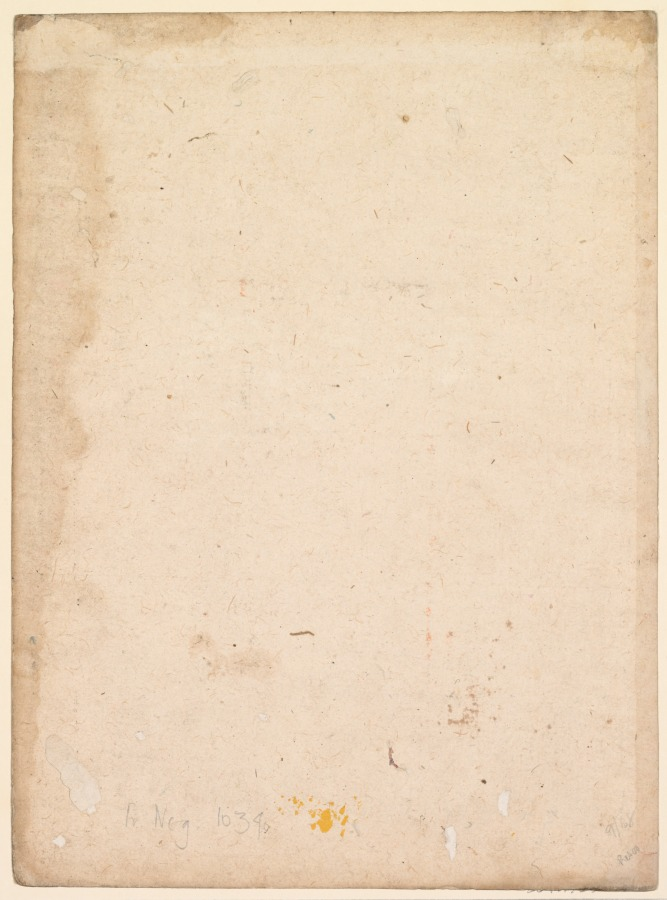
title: Nur Jahan holding a portrait of Emperor Jahangir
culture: Mughal India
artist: attributed to Bishandas (Indian)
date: c. 1627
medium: gum tempera and gold on paper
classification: Painting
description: A woman identified as the favorite wife of the Mughal emperor Jahangir (reigned 1605–27) holds a formal portrait of her husband. He appears aged with graying facial hair behind the jharokha carpet that marks imperial presence. This painting may be modeled on a work depicting Jahangir holding a portrait of his deceased father, showing himself to be the legitimate successor. Nur Jahan, who handled most of the affairs of state, hoped to remain in power after his death. She is depicted in her idealized youth, since she would have been 50 years old when Jahangir died.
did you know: Jahangir died at 58, outliving his younger brothers by about 25 years.